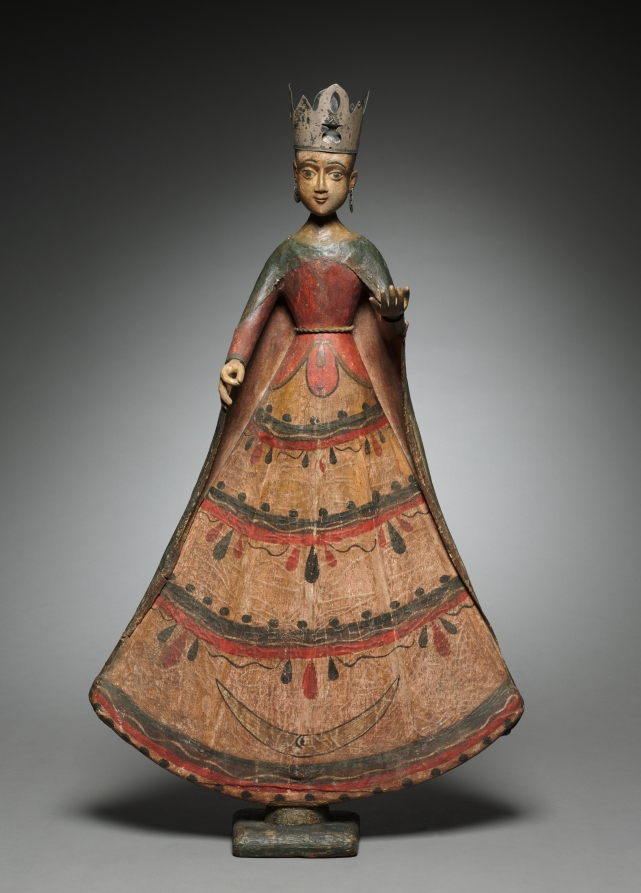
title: Santos: Virgin Crowned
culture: America, New Mexico, 19th century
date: 1800s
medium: painted wood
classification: Sculpture